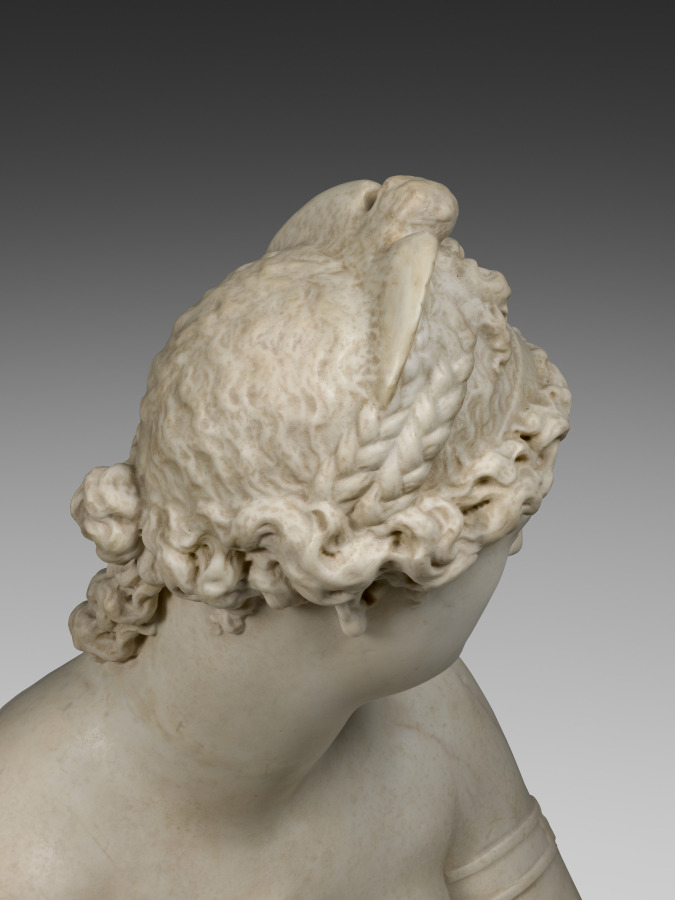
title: Fata Morgana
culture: Italy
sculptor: Giambologna (Flemish, active Italy, 1529–1608)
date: c. 1572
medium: Marble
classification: Sculpture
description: Commissioned by prominent banker Bernardo Vecchietti, whose surname means “old,” Fata Morgana took the name both of the nearby spring that fed the fountain she surmounted, and the legendary fairy who restored King Arthur’s youth. The Fata Morgana is one of only around a dozen sculptures in marble by Giambologna. The artist’s favorite subject was the female nude because of its capacity to showcase his extraordinary ability to model softness in hard stone and to convey dynamic movement. Her twisting pose invites the viewer to appreciate the Fata Morgana from every angle.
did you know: The sculpture originally appeared to emerge mysteriously from a cave within a constructed grotto.